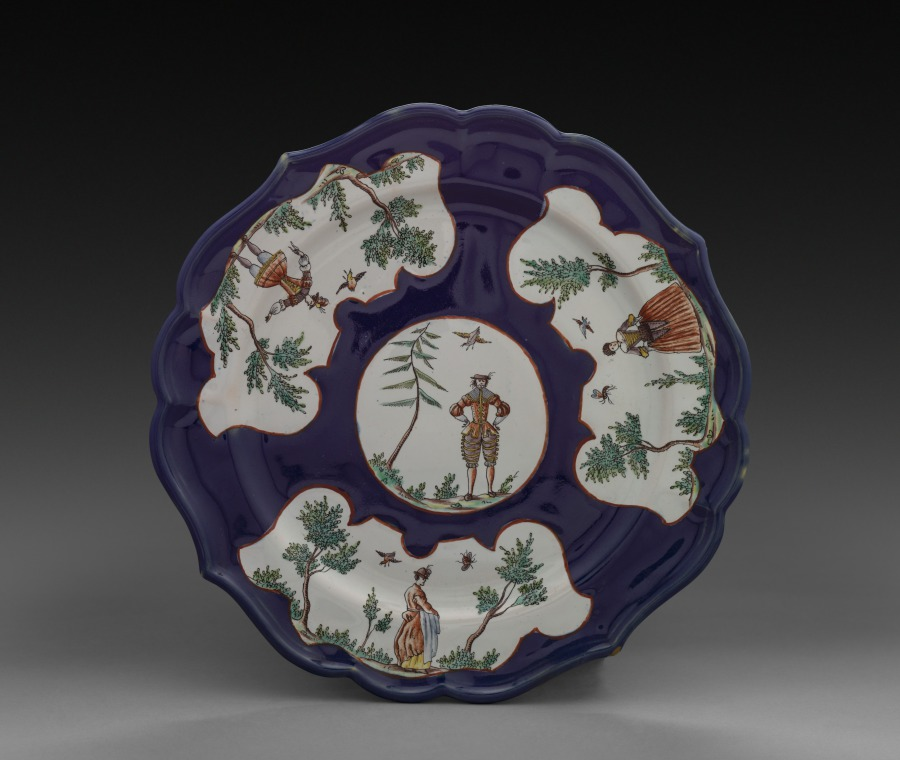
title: Faience Plate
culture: Italy, 18th century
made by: Felice Clerici (Italian)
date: c. 1760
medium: faience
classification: Ceramic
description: The use of colored ground with the irregularly shaped reserve panels with figural decorations reflects the influence of other European ceramics, particularly Meissen porcelain. The decorations of this plate are charmingly naive and demonstrate the efforts of Italian ceramic makers to keep abreast of current fashions in the field.